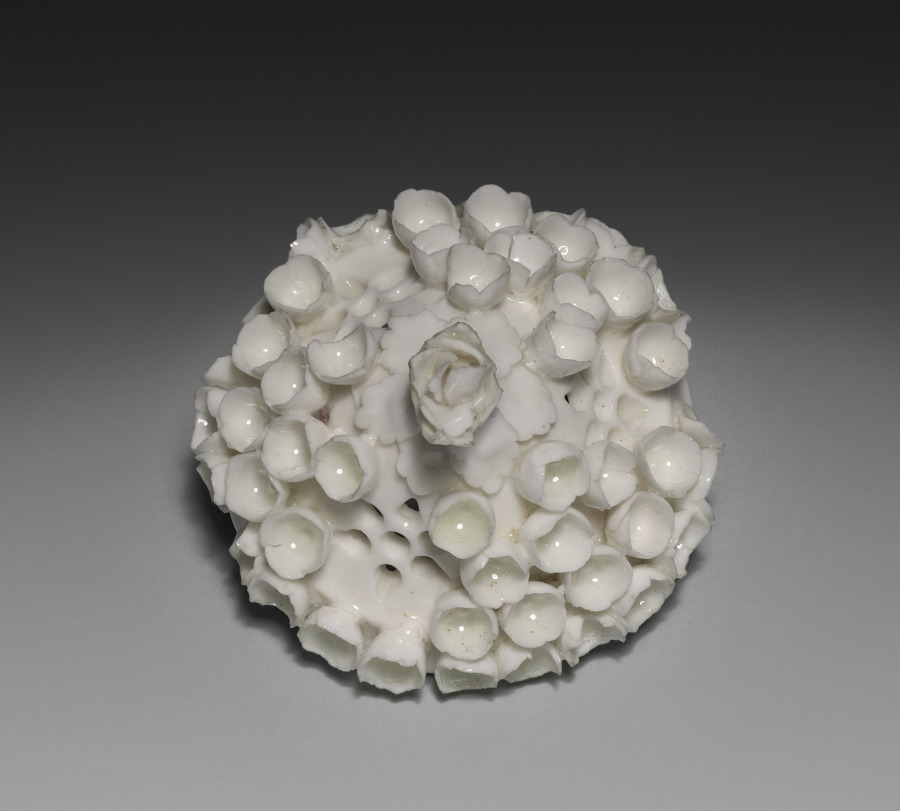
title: Cover for a Potpourri Vase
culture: France, Vincennes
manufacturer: Vincennes Porcelain Factory (France, 1740–56)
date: c. 1750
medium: soft-paste porcelain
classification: Ceramic